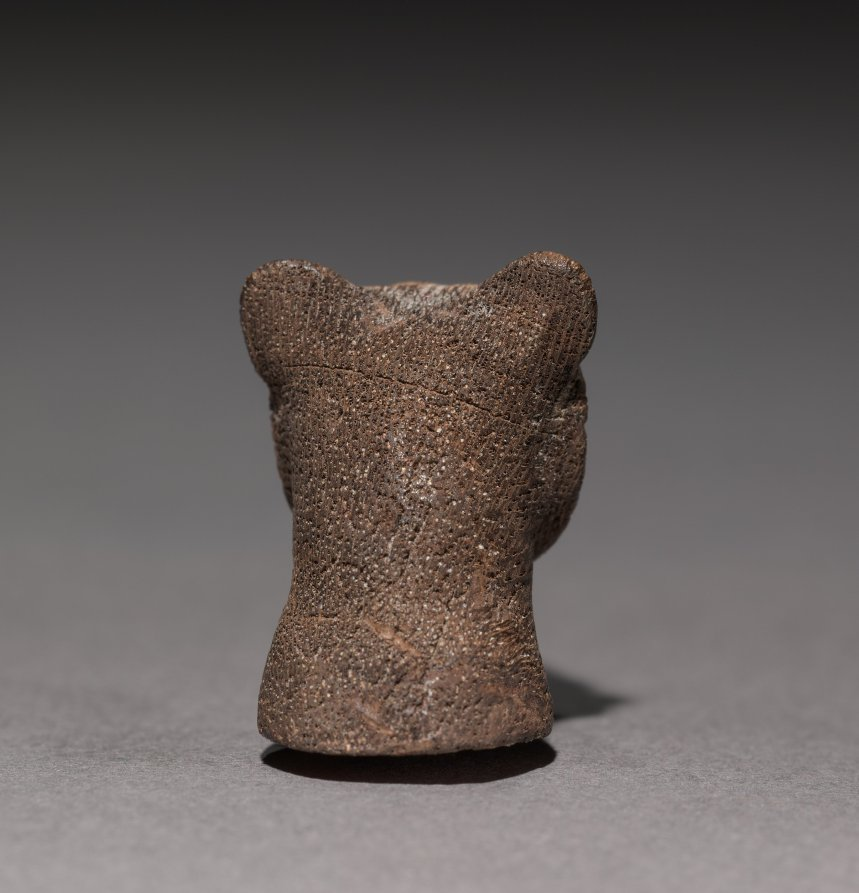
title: Lion Head, perhaps a Steering Oar Butt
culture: Egypt, probably Middle Kingdom (2040–1648 BCE)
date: 2040–1648 BCE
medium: wood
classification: Funerary Equipment